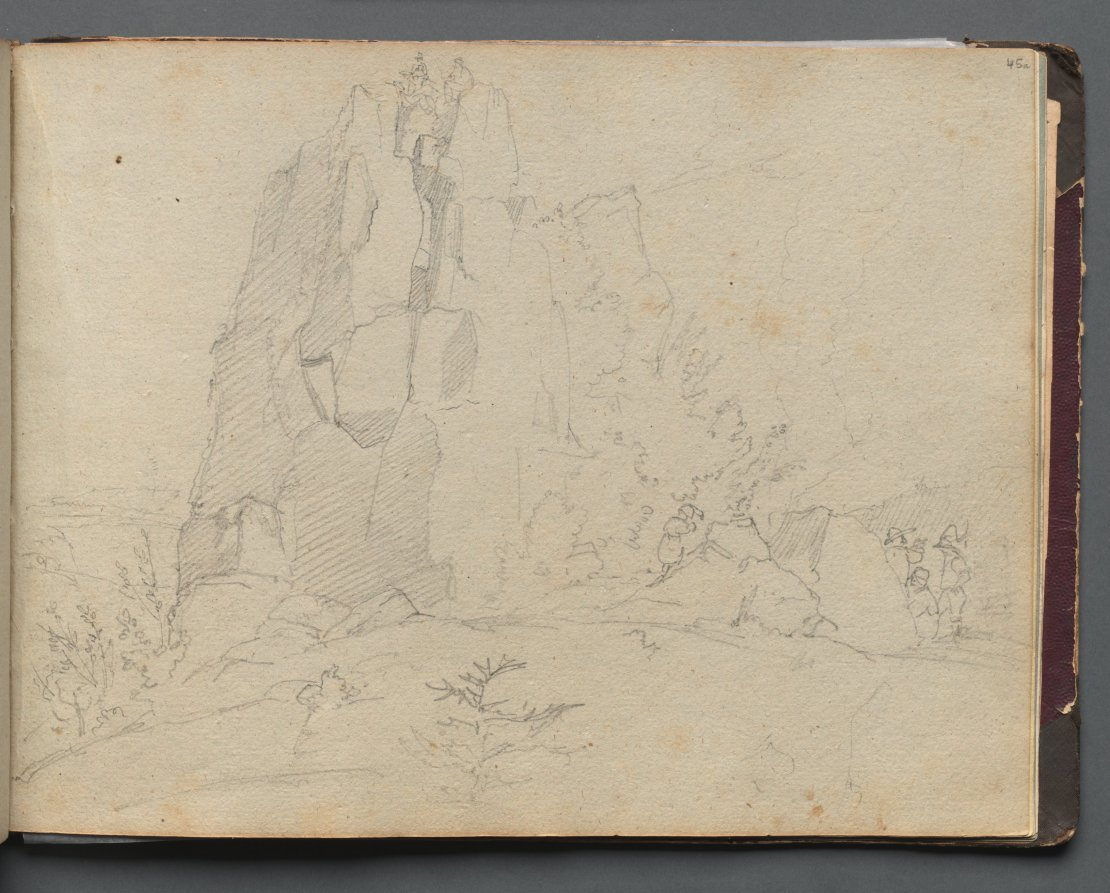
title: Album with Views of Rome and Surroundings, Landscape Studies, page 45a: Rocky Landscape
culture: Germany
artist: Franz Johann Heinrich Nadorp (German, 1794–1876)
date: c. 1830s-70s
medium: graphite on brown paper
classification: Bound Volume